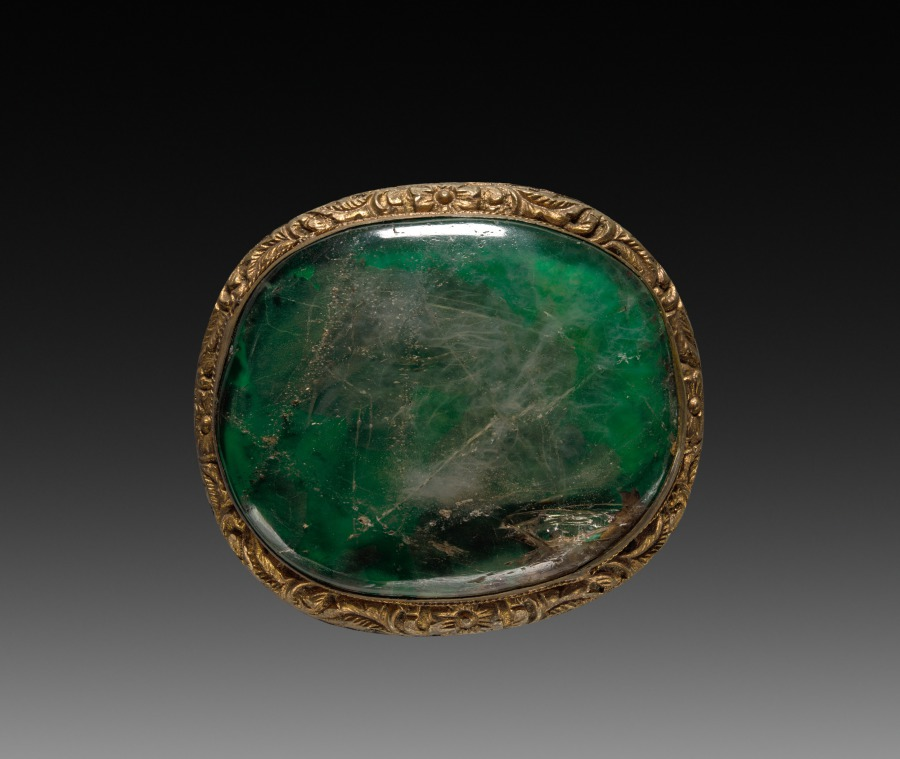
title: Buckle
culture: China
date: 1900s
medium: brass set with glass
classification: Jewelry